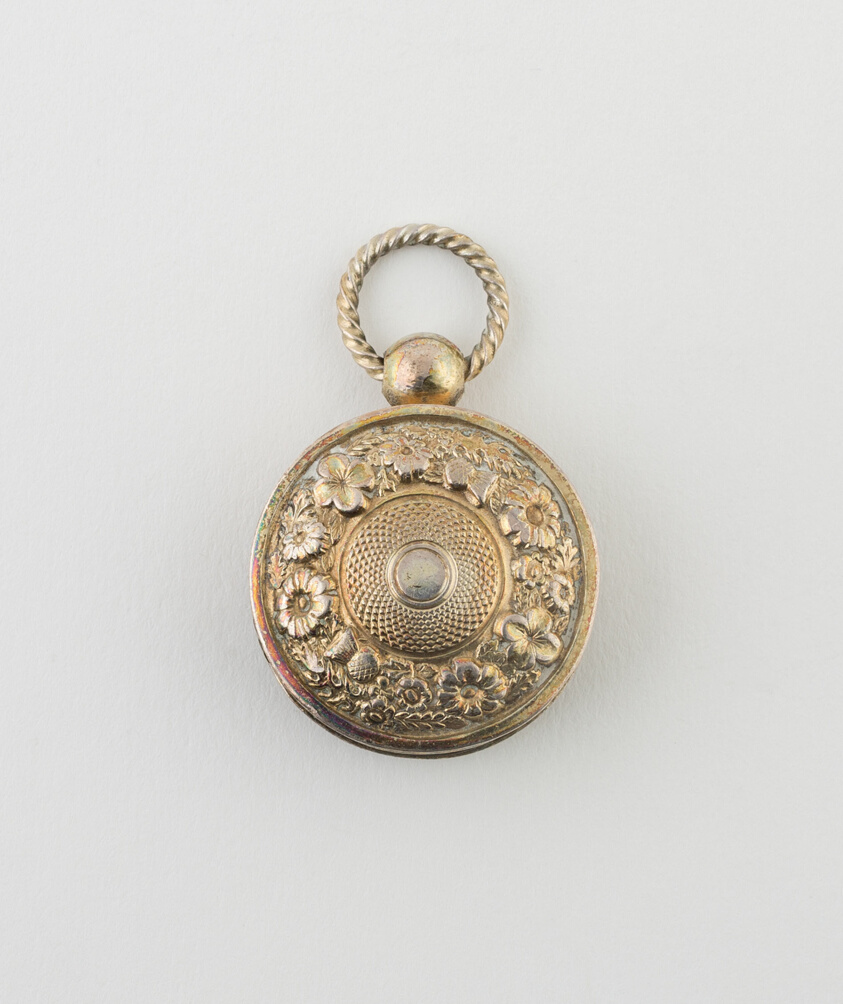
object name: Metalwork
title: Watch-Shaped Vinaigrette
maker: Joseph Taylor; Birmingham, England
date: 1820/21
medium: Silver and silver gilt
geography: Birmingham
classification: container for personal use; vinaigrette (container for health care); european decorative arts; metalwork; silver; decorative object/ornament